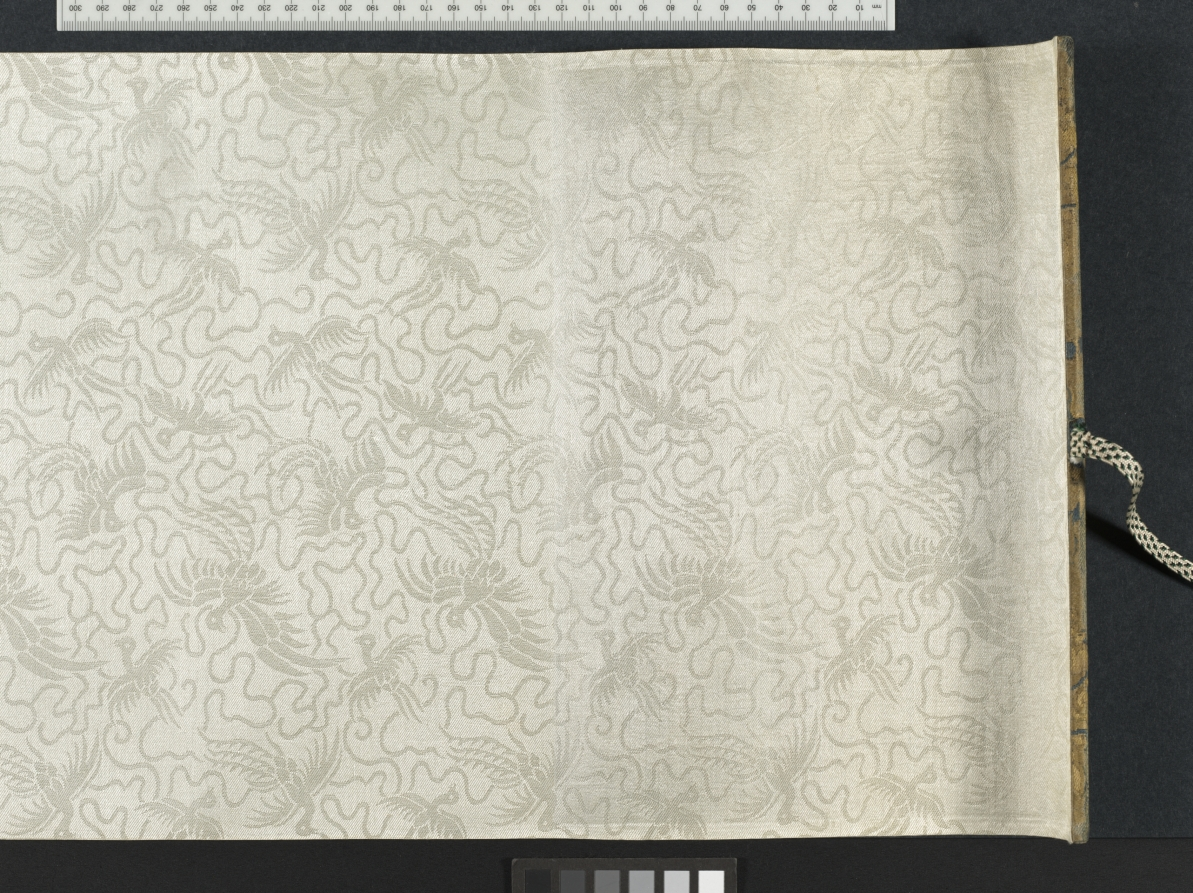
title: Scholar-Hermits in the Autumn Mountains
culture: China, Ming dynasty (1368–1644)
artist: Tang Yin (Chinese, 1470–1523)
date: 1500–1510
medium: handscroll, ink and light color on silk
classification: Painting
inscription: Artist's signature and 2 seals at end of scroll: Tang Yin [seals] T'ang Po-hu; T'ang Tzu'wei t'u-shu.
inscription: Title on frontispiece by Li Cho-kung (dates unknown).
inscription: 1 colophon and 11 additional seals: 1 colophon dated 1915 of Wu Tso-hsi (19th-20th c.); 2 seals of Gao Qifeng 高奇峰 (1889–1933); 5 seals of C. C. Wang 王季遷 (1907–2003); 4 seals unidentified.